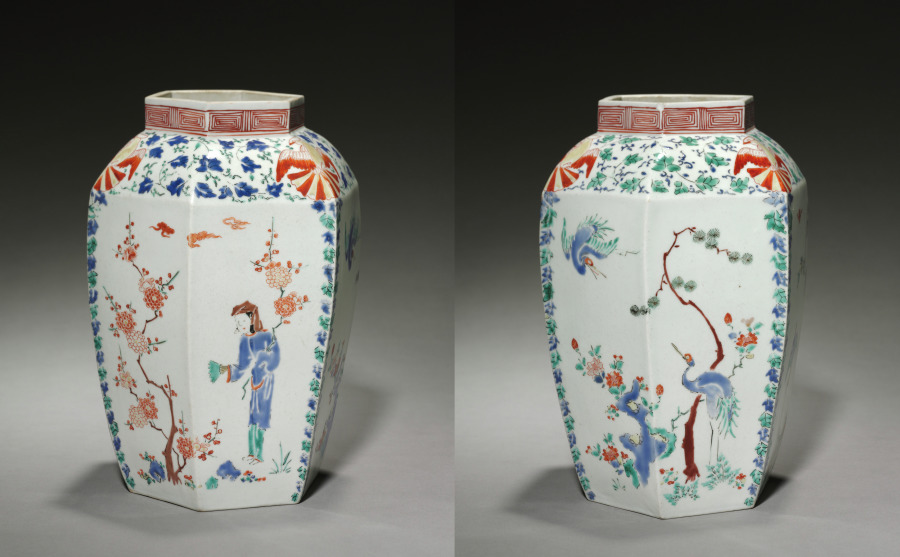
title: Pair of Hexagonal Jars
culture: Japan, Edo period (1615–1868)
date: late 1600s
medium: porcelain with overglaze color enamel and gold decoration (Hizen ware; Kakiemon type)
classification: Ceramic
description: This kakiemon-type jar with plum design is a product made for the European markets. Here, Japanese kakiemon potters transformed the typical plum, bamboo, and pine motifs into a theme appreciating the plum. The 9th-century Japanese scholar and politician Sugawara Michizane established the plum as a symbol of scholarship. An excellent poet, particularly of Chinese-style poetry, he was also well known for his love of plum blossoms. Later, the plum came to represent tenmangu, a shrine for Sugawara.